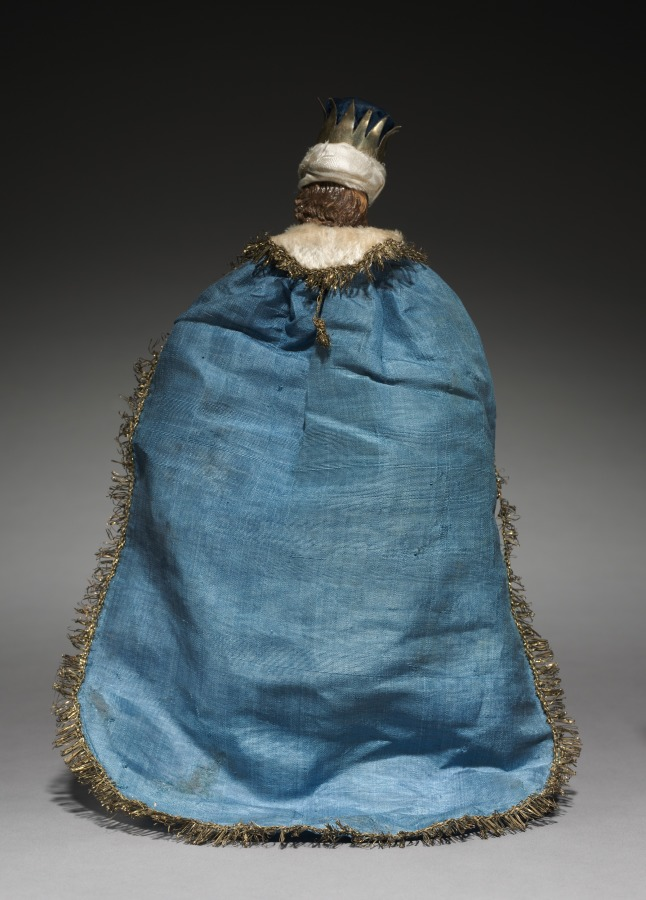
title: Figure from a Crèche: Youthful Magus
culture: Italy, Naples, late 18th-early 19th century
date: 1780–1830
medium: painted wood and terracotta with various textiles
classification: Sculpture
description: The practice of creating scenes of the Nativity for the home dates from the early 1700s in Italy, where people began to set up doll-like figures of about a foot or less in height. The custom was particularly popular in Naples around 1800, where crèche scenes (crèche means cradle, or crib) included many figures, whose heads and hands of painted terracotta, stuffed cloth bodies, and clothing adapted from contemporary local costumes gave them an amazingly realistic character. Representations of the birth of Jesus can be traced to the first few centuries of Christianity. Both living creatures and sculptural depictions of them were used from early times. By the late middle ages it was customary to create life-size figures of wood or stone, naturalistically painted, to represent the characters who participated in the events of Jesus's early life. These sculptures were then arranged in scenes illustrating one or both of the most important of these events, the Adoration of the Shepherds and the Adoration of the Magi-the three kings from the East who came to pay homage to the Christ child. Used in churches, these large figures were especially popular in Italy, Central Europe, Spain, and Portugal.